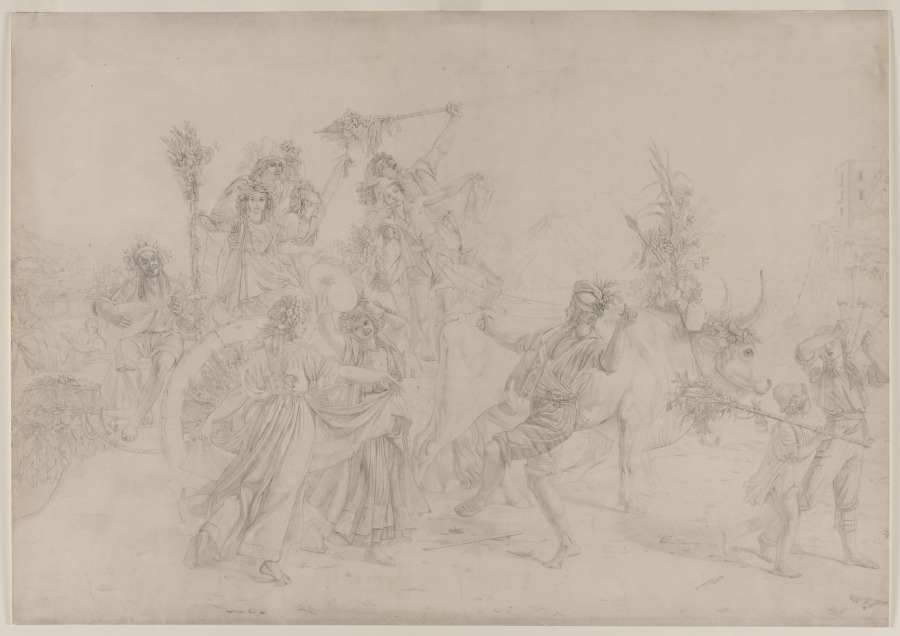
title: Pilgrims Returning from the Feast Day of the Madonna dell'Arco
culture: France, 19th century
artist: Léopold Robert (Swiss, 1794–1835)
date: 1827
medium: pencil with white ink corrections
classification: Drawing